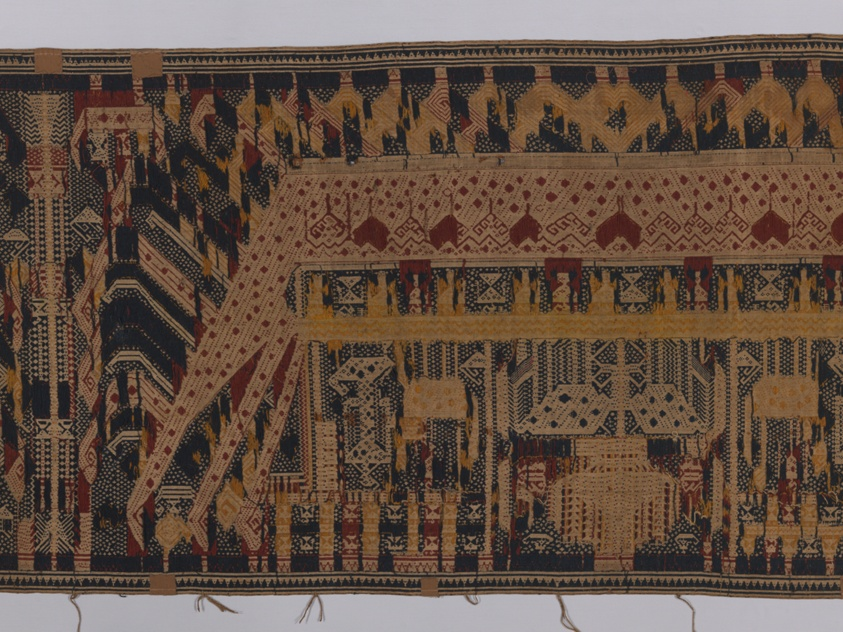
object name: Religious/Ritual Object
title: Ceremonial Hanging (palepai)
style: indonesian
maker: Paminggir people; Indonesia, South Sumatra, Lampung area, Kalianda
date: 19th century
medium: Cotton, silk, and silver-leaf-over-lacquered-paper-strip-wrapped bast fiber (probably ramie), plain weave with supplementary patterning and brocading wefts, main warp fringe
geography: Indonesia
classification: textile; weaving; ritual objects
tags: boats, figures (representations), seas, waves